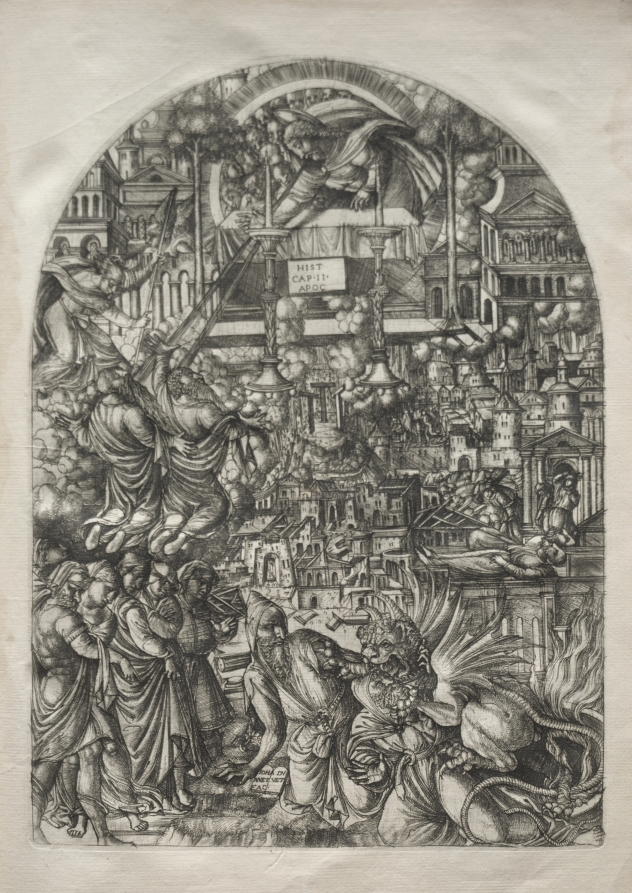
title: The Apocalypse: The Measurement of the Temple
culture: France, 16th century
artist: Jean Duvet (French, 1485–1561)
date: 1546–1556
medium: engraving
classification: Print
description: This print is part of a bound volume of works illustrating the a narrative of the Apocalypse, taken from the Revelation of Saint John in the Bible. The 23 engravings in the series occupied the artist for a number of years and represent his greatest artistic achievement. The museum's volume is one of only seven known complete sets. Jean Duvet was one of the first major printmakers in France and one of the most original artists of the 1500s. Although he worked mostly in the provincial city of Langres, he became aware of Italian art through the circulation of prints—notably those of Marcantonio Raimondi. His solidly modeled human figures reflect the influence of the Italian High Renaissance. Duvet, however, developed an idiosyncratic, highly artificial style with crowded compositions that ignore rational space in favor of ornamental surface patterns.